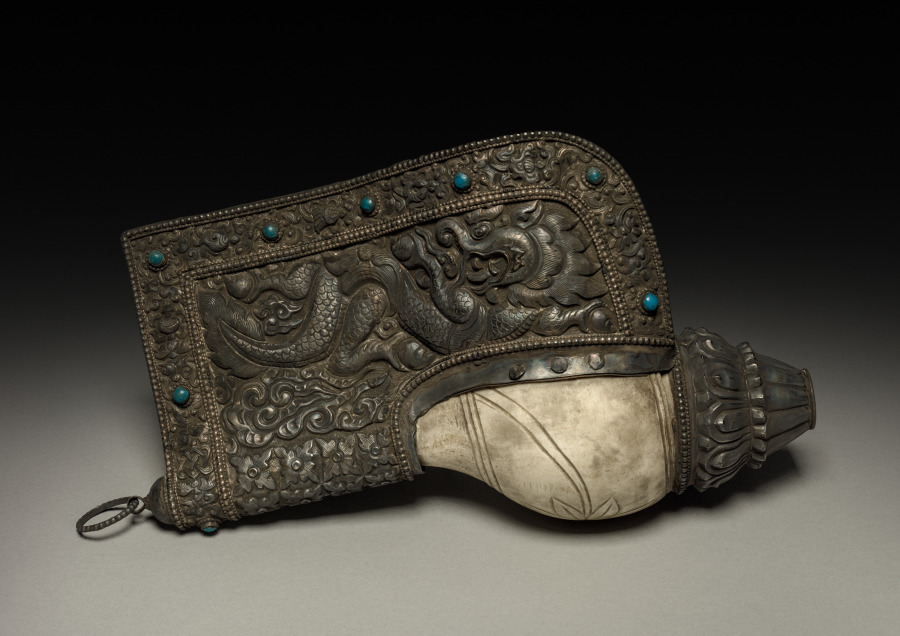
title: Conch Shell Set in Silver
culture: Tibet, 19th century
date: 1800s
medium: shell and silver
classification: Metalwork